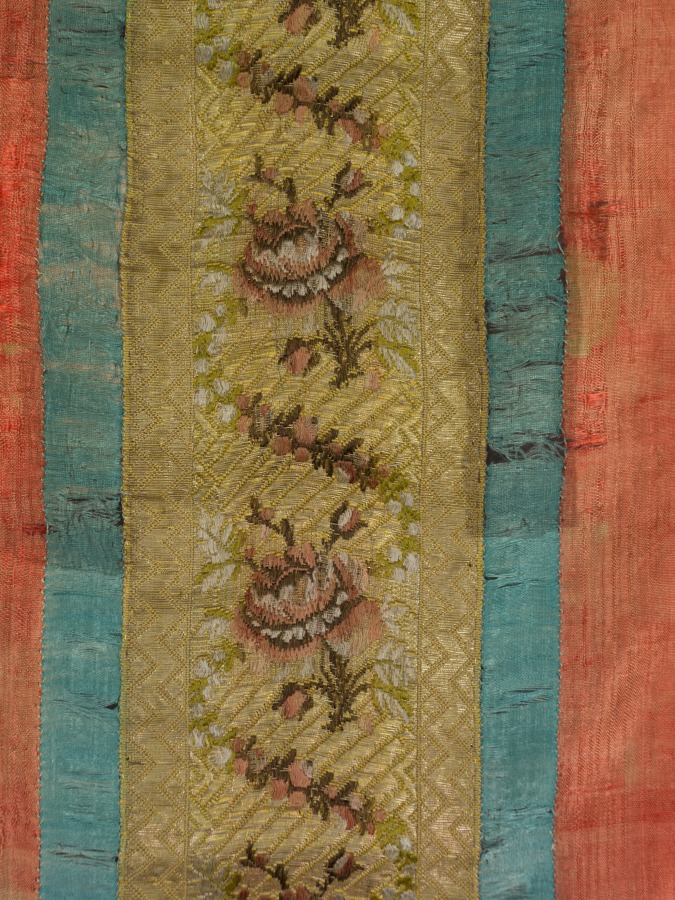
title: Curtain panel (sitara)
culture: Africa, North Africa, Algeria, Algerian weaver and embroiderer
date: 1800s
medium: Linen, silk, gold, silver, dye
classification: Embroidery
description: During the 1700s, stunning large embroidered door curtains such as these hung across doorways onto interior courtyards of multistoried residences. Light entered through their loosely woven linen ground while the reversible embroidered decoration provided beauty and privacy. Such curtains have three embroidered widths, the third missing here, joined by colorful plain silk ribbons flanking a French floral ribbon in the center.